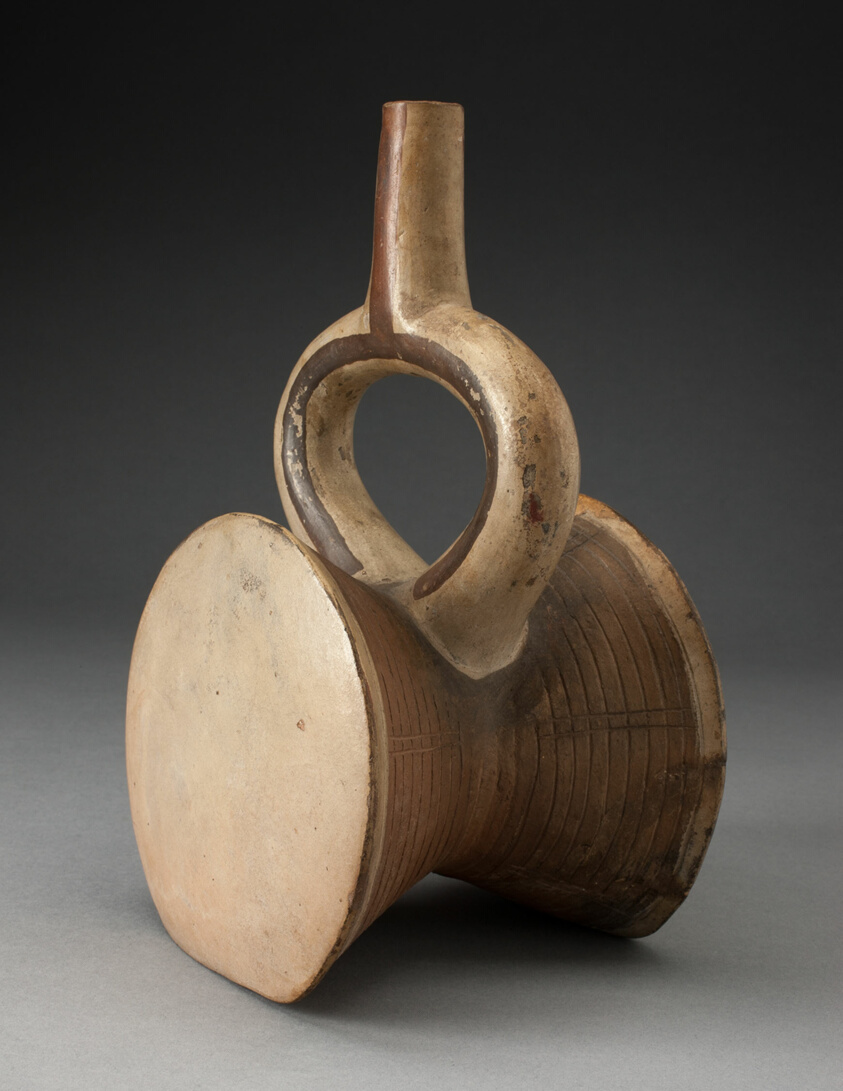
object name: Vessel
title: Stirrup Spout Vessel in the Form of a Drum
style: moche, mochica v, mochica, early intermediate period, Pre-Columbian, americas, Arts of the Americas, andean, andes, south american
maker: Moche (North coast, Peru)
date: 100 BCE–500 CE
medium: Ceramic and pigment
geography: Peruvian North Coast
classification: earthenware; ceramics; vessel; art of the americas